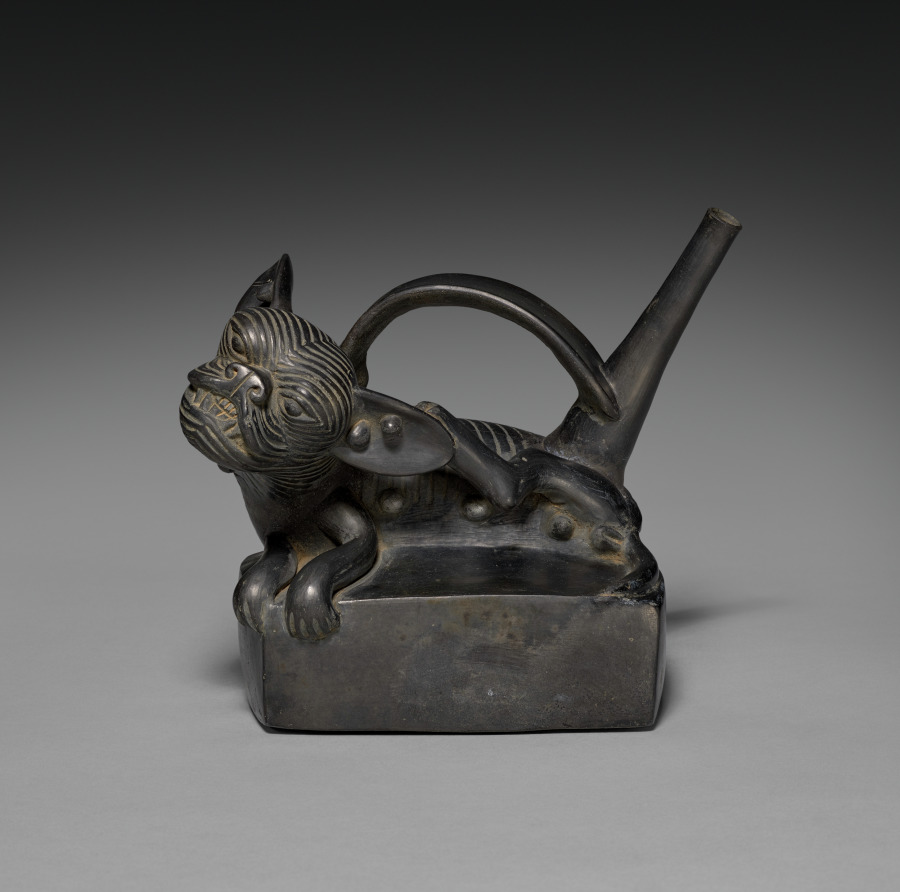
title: Vessel with Reclining Dog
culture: Central Andes, North Coast, Chimú-Inka style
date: 1470–1532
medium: ceramic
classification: Ceramic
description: This vessel represents a Peruvian hairless dog who has recently given birth and seems to be taking a break from maternal obligations. The meanings of such dogs may be connected to the trade networks that brought them to Peru from Mexico in the late pre-Hispanic period. Perhaps these foreign ties made them prestige animals whose breeding engendered further status for the owner.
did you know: This vessel represents a Peruvian hairless dog who has recently given birth.